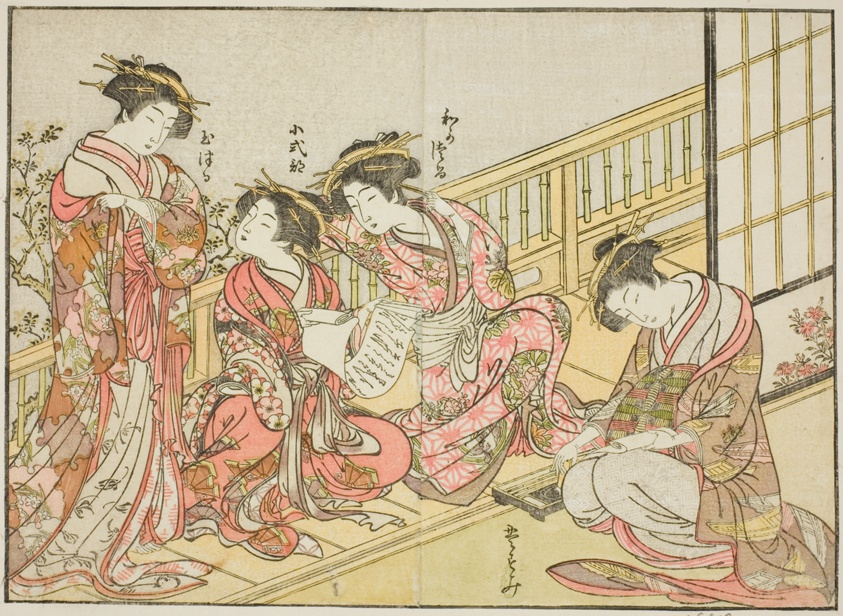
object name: Print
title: Courtesans of the Takeya, from the book "Mirror of Beautiful Women of the Pleasure Quarters (Seiro bijin awase sugata kagami)," vol. 1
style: Japanese (culture or style)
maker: Katsukawa Shunsho; Japanese, 1726-1792; Kitao Shigemasa; Japanese, 1739-1820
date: 1776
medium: Color woodblock print; double-page illustration cut from a book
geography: Japan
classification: print; asian art